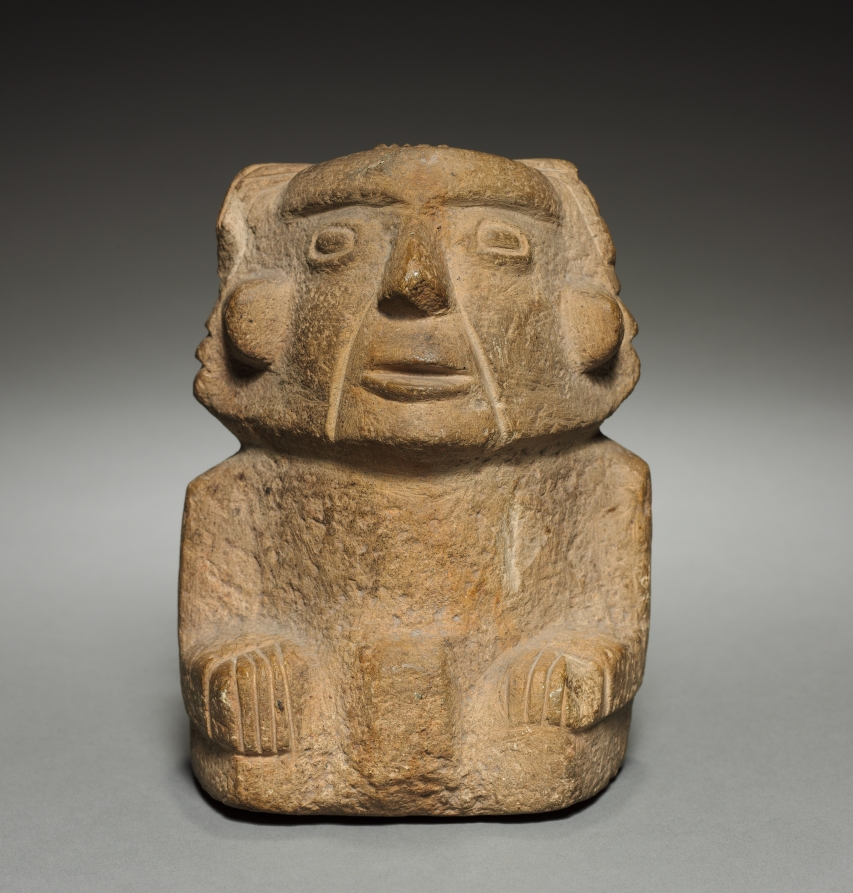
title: Seated Figure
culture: Pre-Columbian style, 20th century (?)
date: 20th Century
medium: tan stone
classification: Sculpture